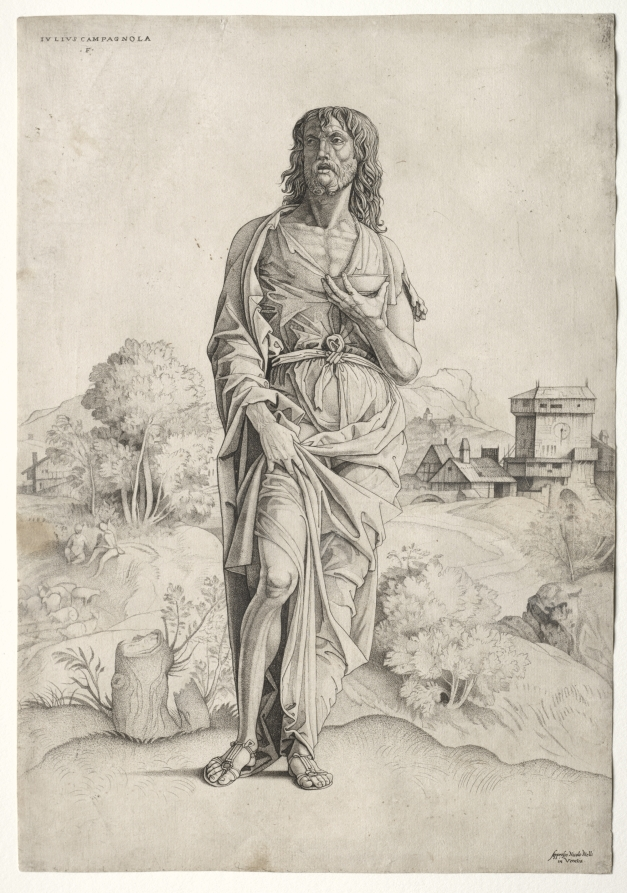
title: Saint John the Baptist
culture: Italy, 16th century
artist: Giulio Campagnola (Italian, 1482–1515)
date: c. 1505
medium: engraving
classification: Print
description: Slender and weathered from preaching in the wilderness where he lived on locusts and wild honey, John the Baptist carries a bowl of water, symbolizing his role as the baptizer of Christ. In this print, Campagnola combined engraved lines with his innovative stipple technique, in which tiny dots softly shade the surface of the saint’s body and produce the hazy atmosphere of the rustic landscape.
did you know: The small bowl held by the saint signifies his role as baptizer of Christ.